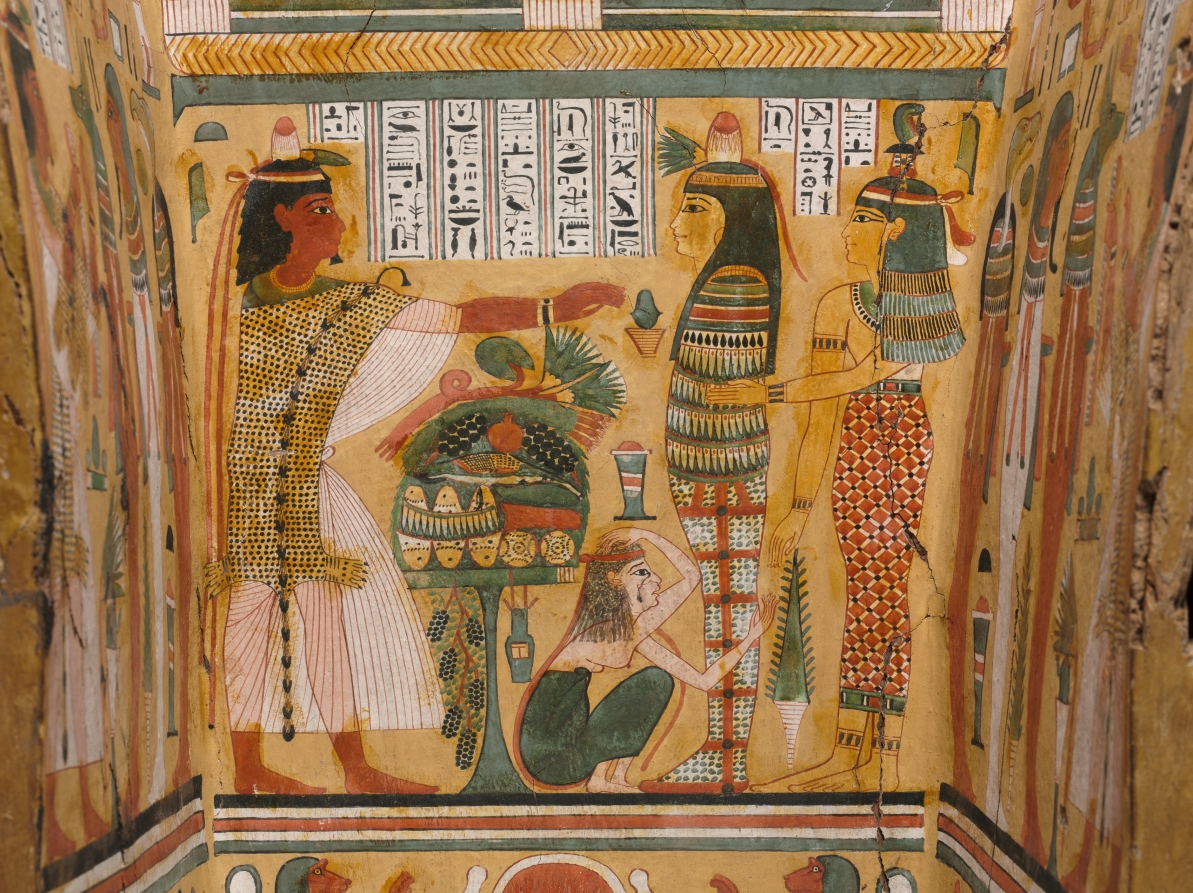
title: Coffin of Nesykhonsu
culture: Egypt, Thebes, Third Intermediate (1069–715 BCE), Dynasties 21–22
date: c. 976–889 BCE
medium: gessoed and painted sycamore fig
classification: Funerary Equipment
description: Egyptian coffins told stories and illustrated spells to help the deceased transition safely to the afterlife. Inside Nesykhonsu's coffin there are two jackals, one facing right and the other left, near the top. Here, the jackal represents the powerful deity Anubis, the god of the afterlife and embalming.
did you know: Two of Nesykhonsu's titles, "Lady of the House" and "Singer of the Choir of Mut the Great," are written on the outside of the coffin.